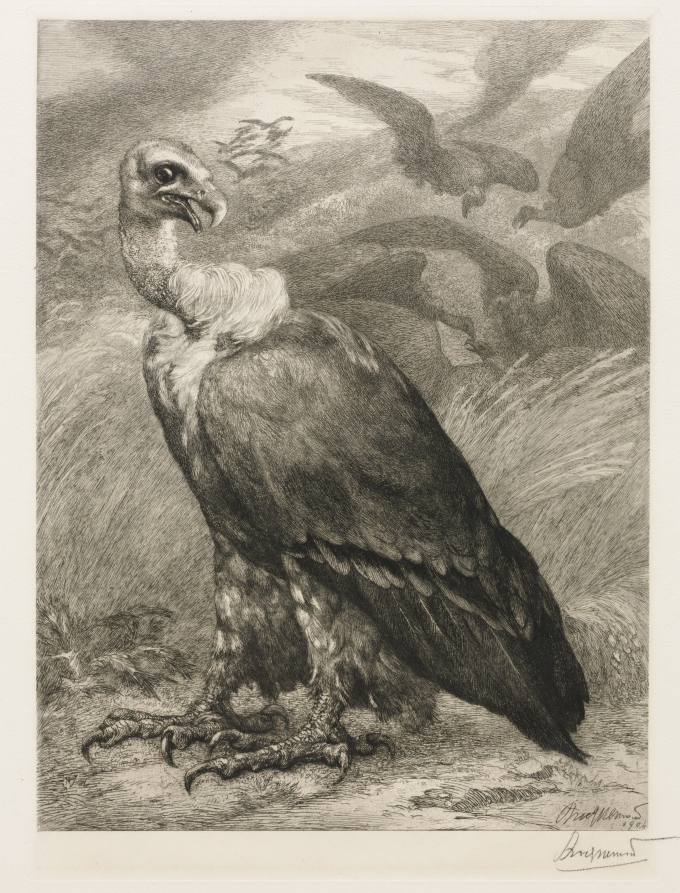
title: The Vulture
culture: France, 19th century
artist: Félix Bracquemond (French, 1833–1914)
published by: Emil Dolot (Société des amis de l'estampes français)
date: 1904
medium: etching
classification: Print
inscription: signed lower right, in black crayon, Bracquemond inscribed, lower left margin, letterpress, Imprimé pour M. Emil Dolot